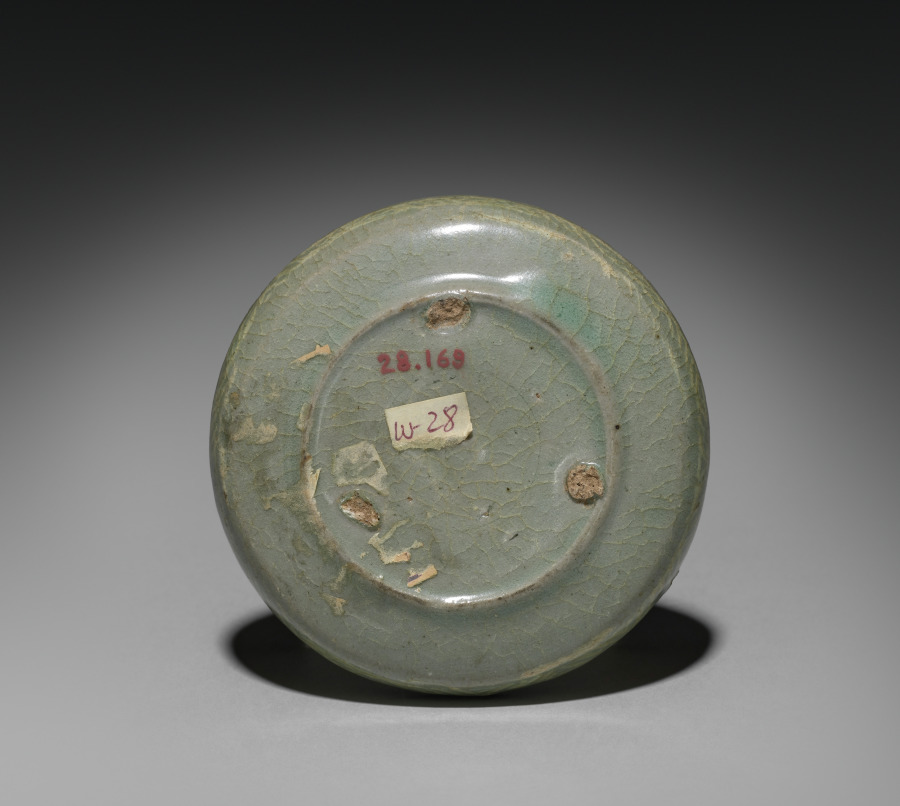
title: Box with Chrysanthemum and Scroll Design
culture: Korea, Goryeo dynasty (918–1392)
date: 918–1392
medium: inlaid celadon ware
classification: Ceramic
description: Celadons, spoons, seals, and bronze mirrors were the most common burial objects in tombs during the Goryeo period (918–1392). Once used to contain colored powder, rouge, and eyebrow gel for makeup, this small container was one of the standard goods that furnished elites' tombs. Both women and men used the grain powder of rice or millet for whitening their skin, safflower extract for rouge, and plant ash or soot for eyebrow gel. Yet, natural-looking makeup seems to have been the most favorable one in Korea according to the travelogue by Xu Jing (1091–1153), the Chinese diplomat who visited Korea in 1123.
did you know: This ceramic container was used to store either incense or cosmetics.